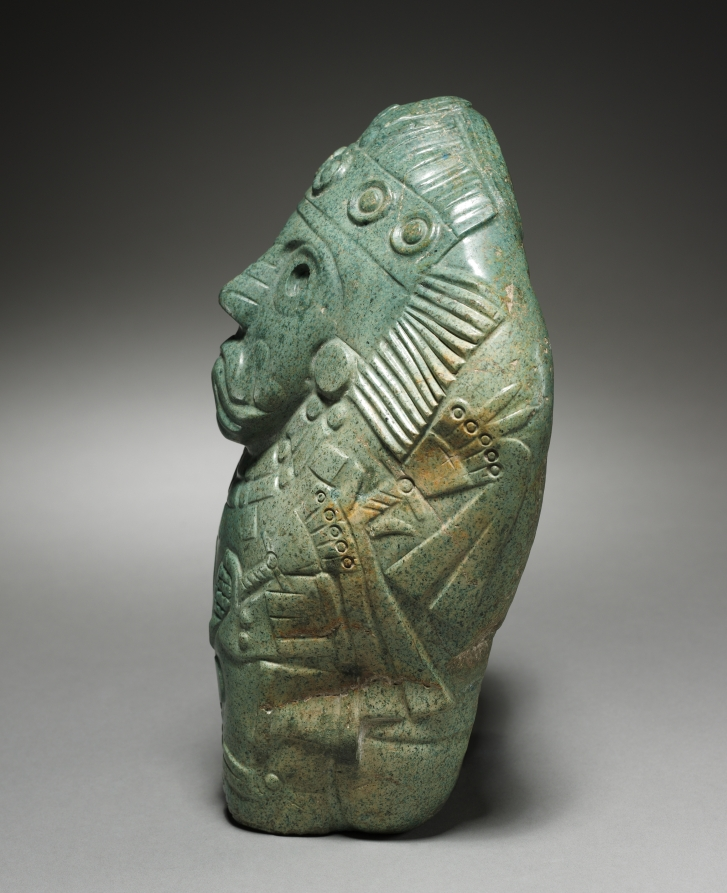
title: Tlaloc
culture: Central Mexico, Aztec, 13th-16th century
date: c. 1200–1519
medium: stone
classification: Sculpture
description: A natural cobble of greenstone has been smoothed and carved in low relief to portray the Aztec rain god Tlaloc, recognizable by his ringed eyes, twisted nose element, and fanged mouth. As the provider of water, Tlaloc is a patron of agriculture and holds a stalk of maize in one hand. To the Aztecs, Tlaloc was an ancient and civilized god; his worship could be traced back to the ancient ruined site Teotihuacan.